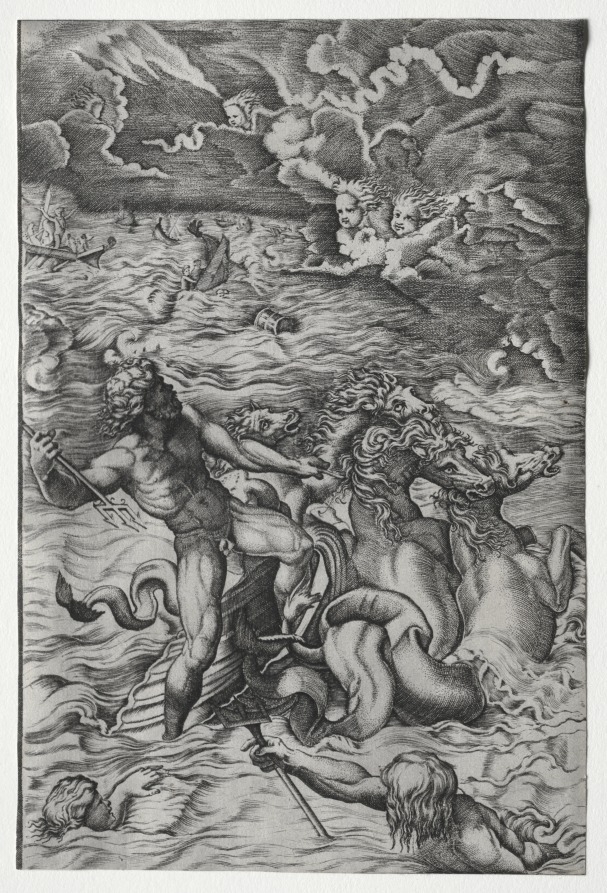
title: Neptune Calming the Tempest That Aeolus Raised Against Aeneas's Fleet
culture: Italy, 16th century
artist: Marcantonio Raimondi (Italian, 1470/82–1527/34)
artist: after Raphael (Italian, 1483–1520)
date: c. 1515–16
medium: engraving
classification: Print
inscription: verso, lower left, in graphite: [MK?] 30941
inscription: lower center, in graphite: [illegible word] / Marcantonio Raimondi / N° 352 [followed by three partially erased, illegible words]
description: This engraving depicts an episode in the epic Aeneid by the Roman poet Virgil (70–19 BC). Skimming the ocean waves in a seashell chariot, Neptune raises his trident as he confronts the cherub-faced winds sent by their master, Aeolus. Although some of the Trojan fleet is lost in the waves, Neptune calms the tempest in time to save Aeneas and a few of his ships as they escape the fallen city of Troy in search of a new home.